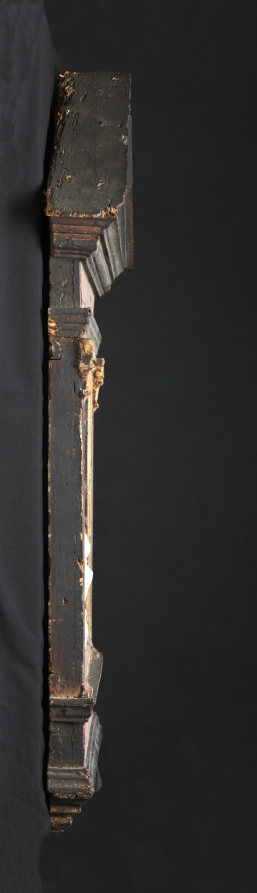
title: Madonna and Child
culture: Italy, 15th century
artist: Luca della Robbia (Italian, 1400?–1482)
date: c. 1460–1470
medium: glazed terracotta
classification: Sculpture